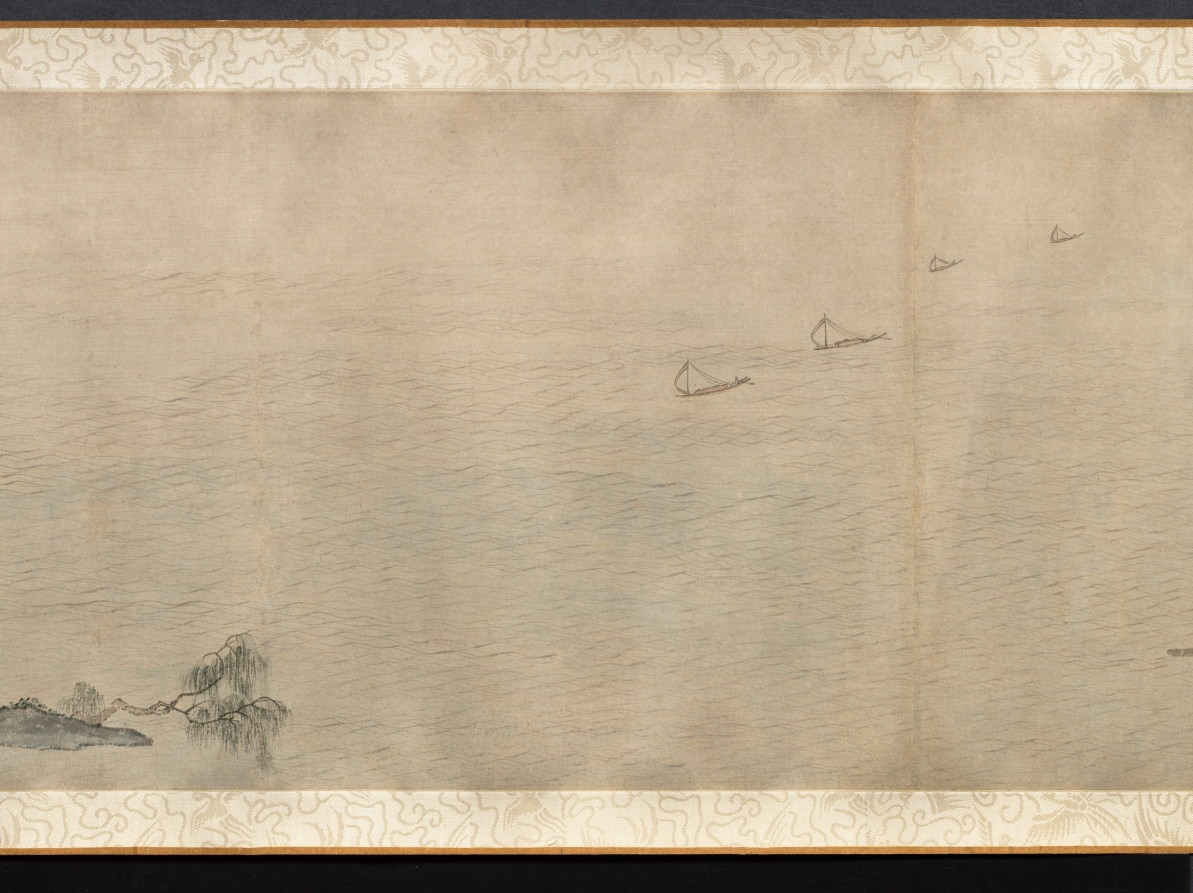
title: Ten Thousand Li of the Yangzi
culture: China, Ming dynasty (1368–1644)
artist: Dai Jin (Chinese, 1388–1462)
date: c. 1400s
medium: Handscroll; ink and color on paper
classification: Painting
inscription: Two colophons at end. Artist's seals: Dai Jin 戴進 and Wenjin 文進.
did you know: Dai Jin is traditionally considered the founder of the Zhe School, a style of landscape painting.